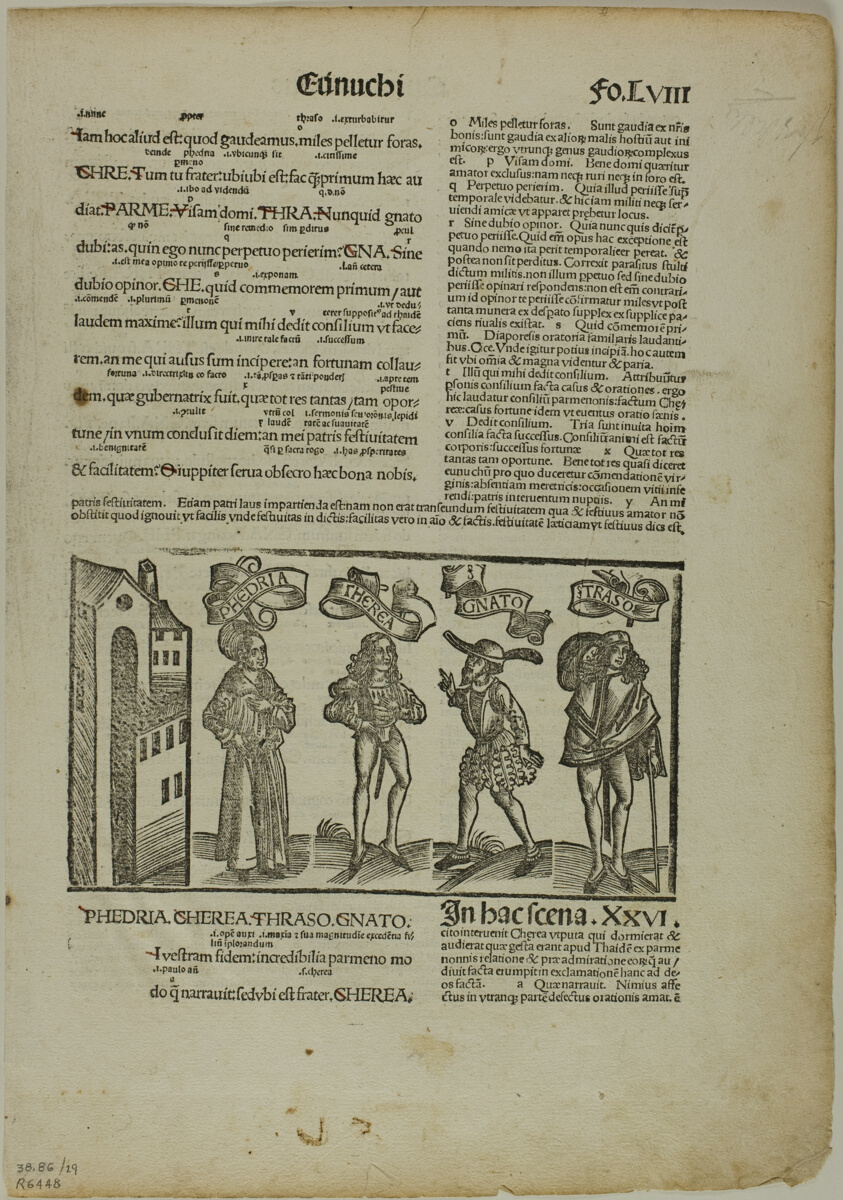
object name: Print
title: The Eunuch from Terenti cum directorio, Plate 29 from Woodcuts from Books of the 15th Century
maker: Unknown Artist (Strasbourg, late 15th century); printed and published by Johann Reinhard Grüninger (German, c. 1455–1532); original text by Terence (Publius Terentius Afer) (North African, 195/185–c. 159 B.C.); portfolio text by Wilhelm Ludwig Schreiber (German, 1855–1932)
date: 1496, portfolio assembled 1929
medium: Woodcut in black from five block, and letterpress in black (recto and verso), on cream laid paper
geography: Germany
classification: woodcut; print; prints and drawing